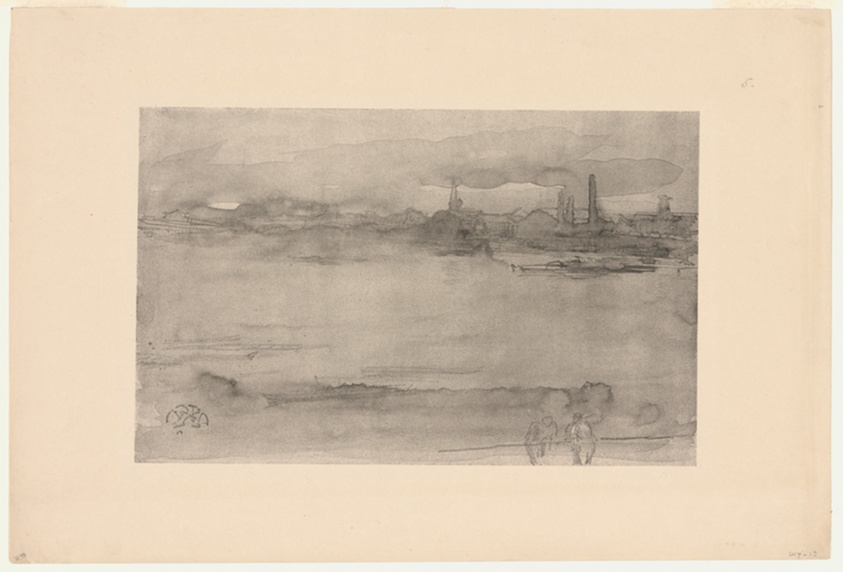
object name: Print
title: Early Morning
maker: James McNeill Whistler (American, 1834-1903)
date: 1878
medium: Lithotint with scraping, on a prepared half-tint ground, in black on cream wove proofing paper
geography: United States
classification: lithotint; lithograph; print; prints and drawing; paper